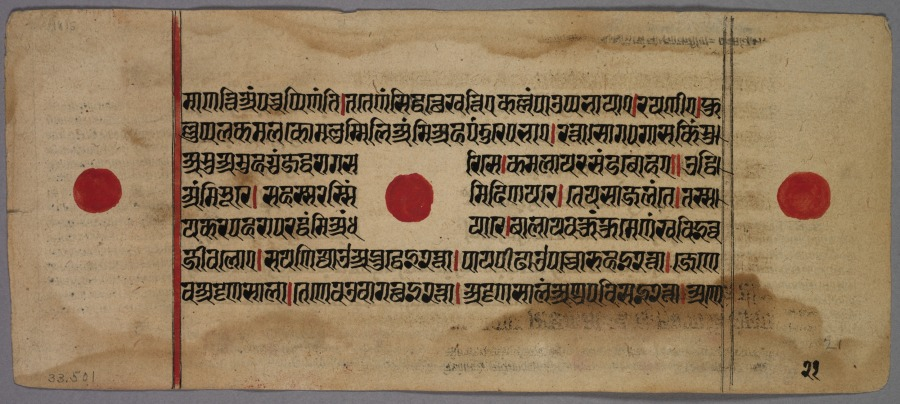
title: Leaf from a Jaina Manuscript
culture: India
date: 1400s–1500s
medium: ink on paper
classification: Manuscript